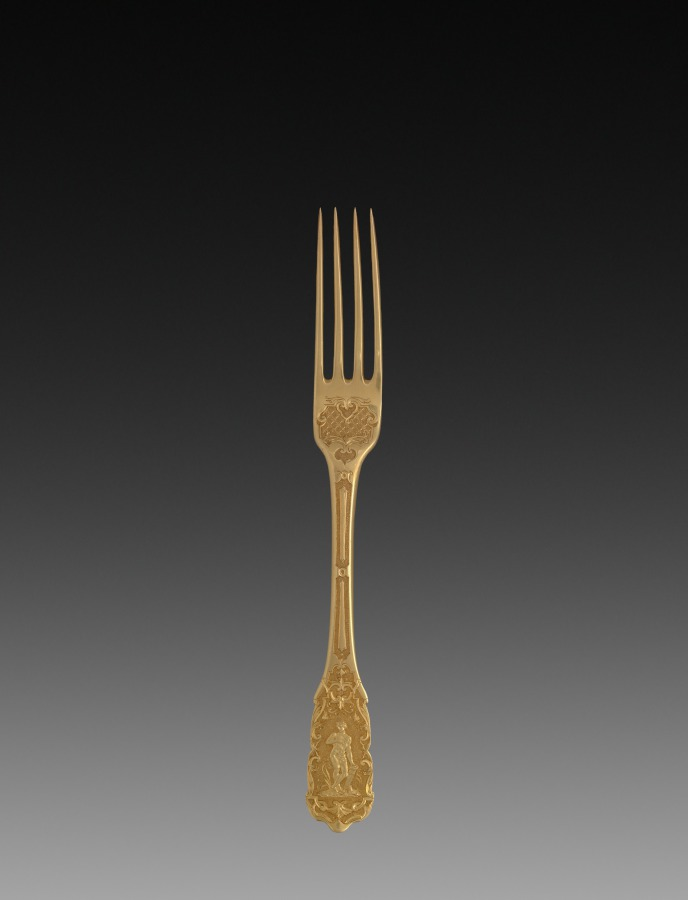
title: Fork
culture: Germany, Augsburg(?), 18th century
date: c. 1725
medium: gold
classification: Metalwork